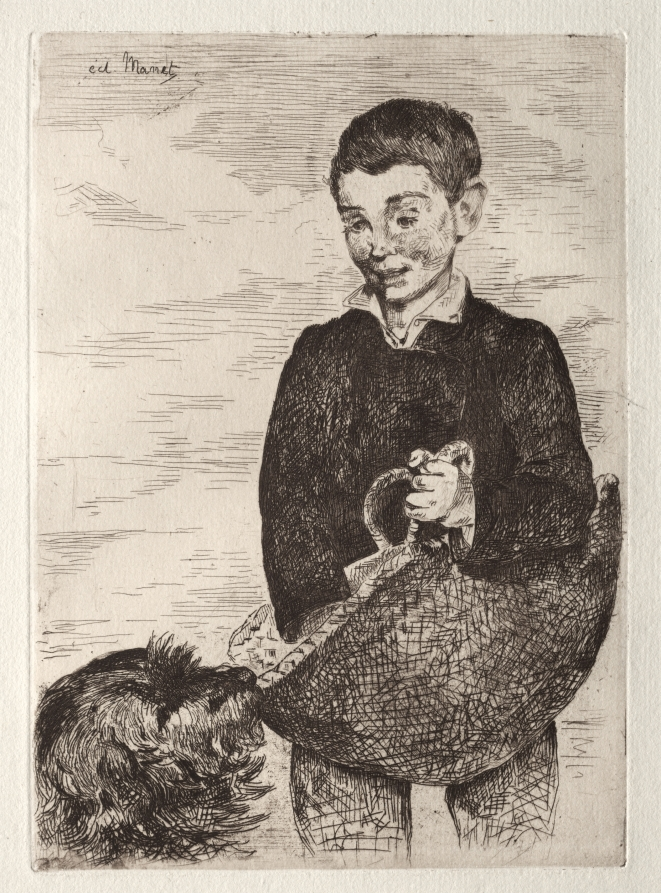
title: Le gamin au chien, avec le cabas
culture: France, 19th century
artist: Édouard Manet (French, 1832–1883)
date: 1862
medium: etching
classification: Print